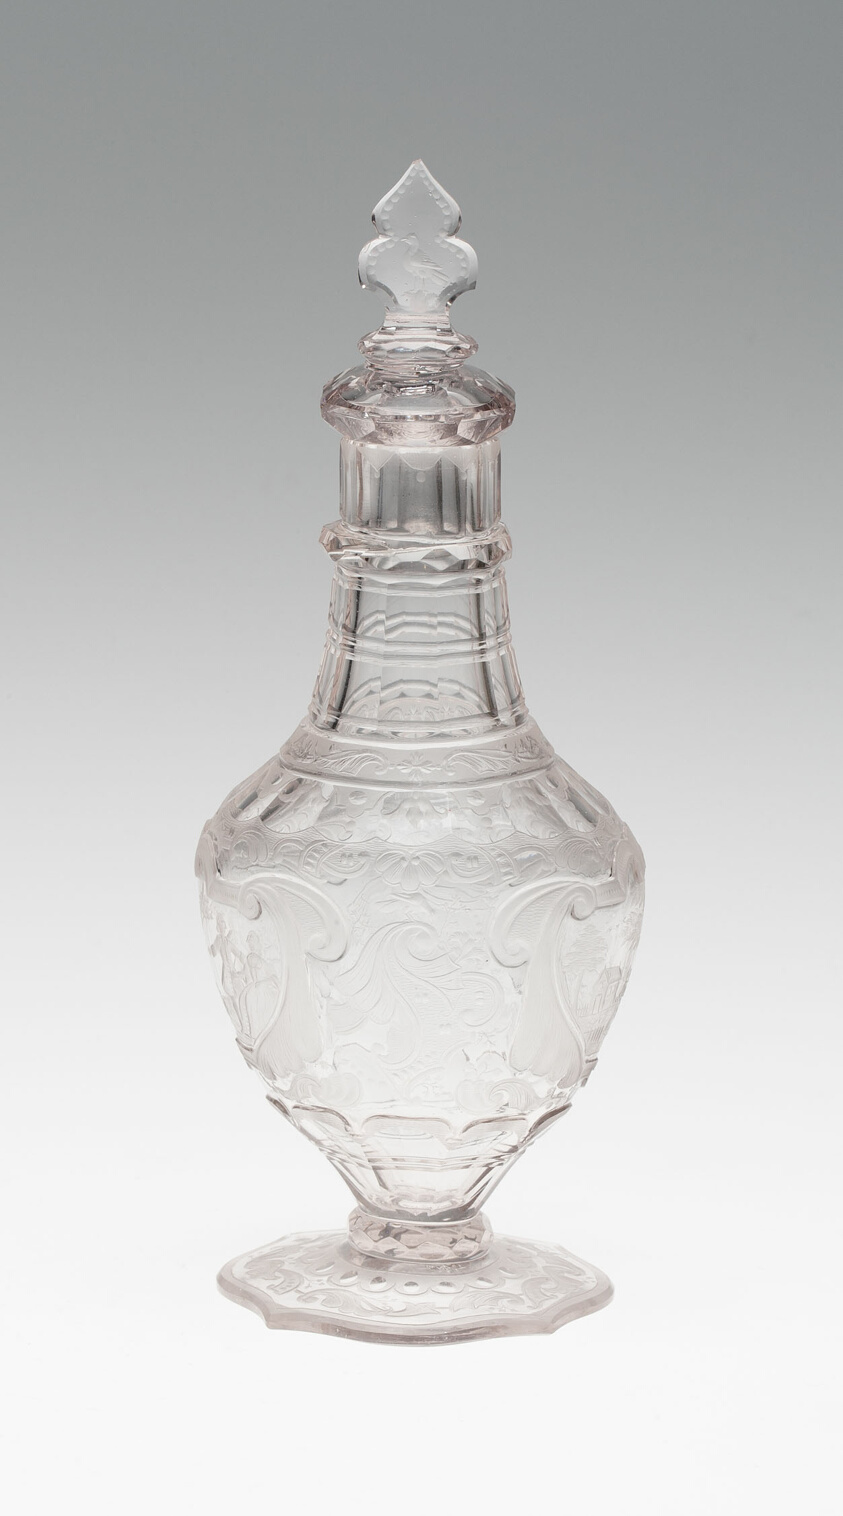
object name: Glass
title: Cruet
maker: Poland (formerly German Silesia)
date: c. 1750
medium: Glass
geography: Silesia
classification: glass; european decorative arts